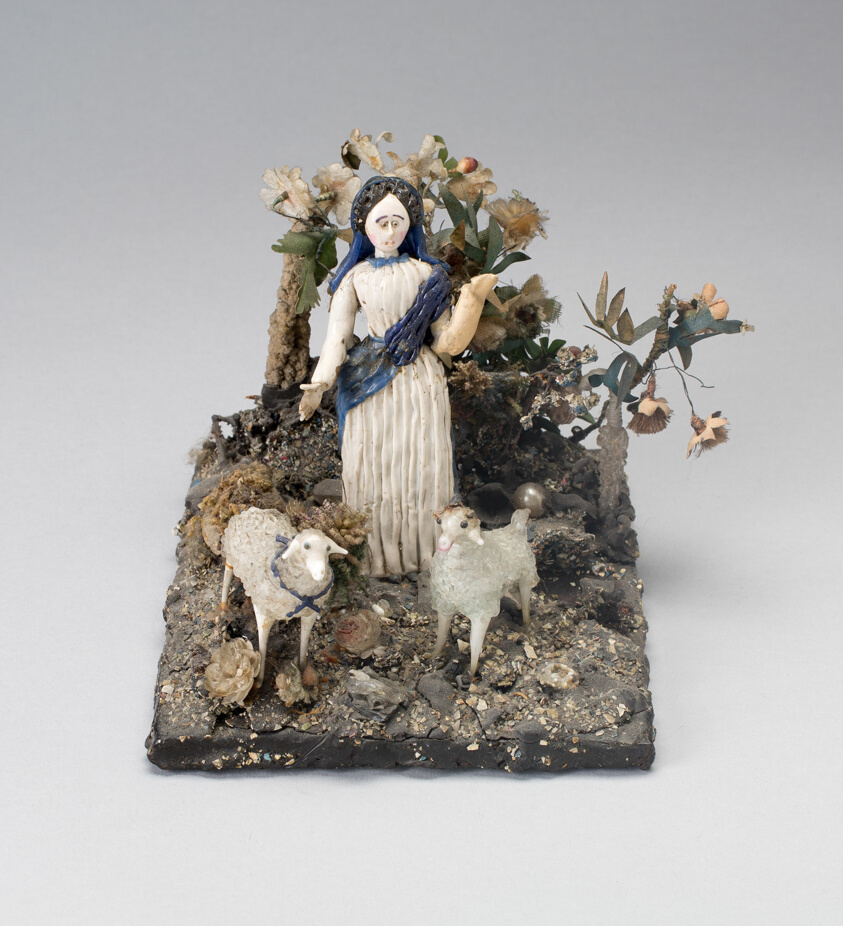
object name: Glass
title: Shepherdess in a Landscape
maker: Nevers, France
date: 1750/99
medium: Glass; lampwork (verre de Nevers), metal armature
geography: France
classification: decorative object/ornament; lampwork; glass; european decorative arts